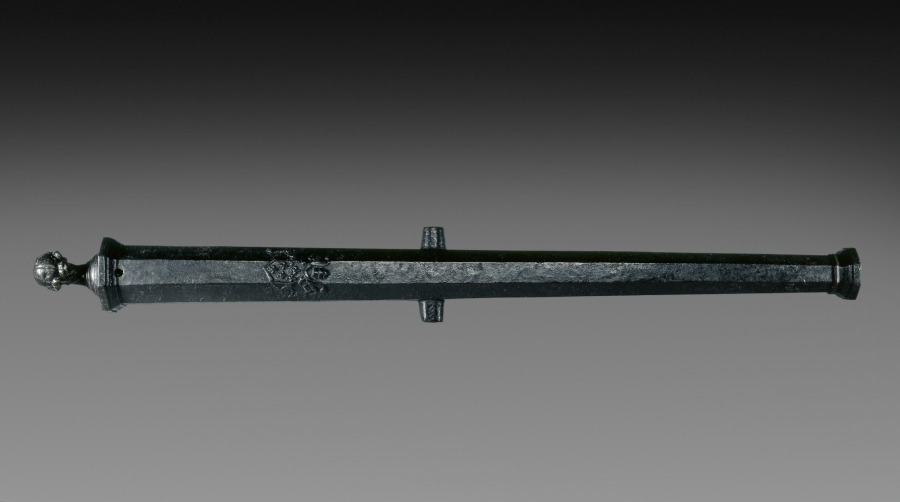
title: Falconet with Arms of Alessandro Farnese, Pope Paul III (1534-1549)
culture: Italy, 16th century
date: 1534–49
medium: bronze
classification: Arms and Armor